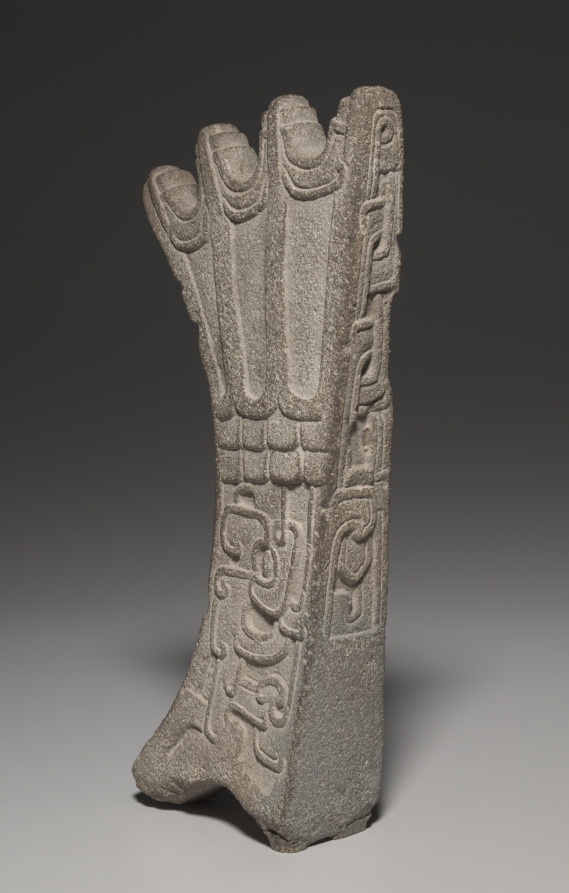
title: Ballgame Palma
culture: Mexico, Gulf Coast, Classic Veracruz style (600-1100)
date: c. 900–1100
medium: stone, pigment traces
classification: Sculpture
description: In art, ballplayers are shown wearing palmas atop hip protectors like one displayed nearby. The palma covers the chest, as if to insulate it from bruising encounters with the rubber ball. The stone sculptures are too heavy for wear but may mimic the shape of lighter-weight gear used during play. This elegant, fan-shaped palma is adorned with scrolls that form grotesque heads in profile. Traces of blue indicate that like many ancient sculptures it was brightly painted.